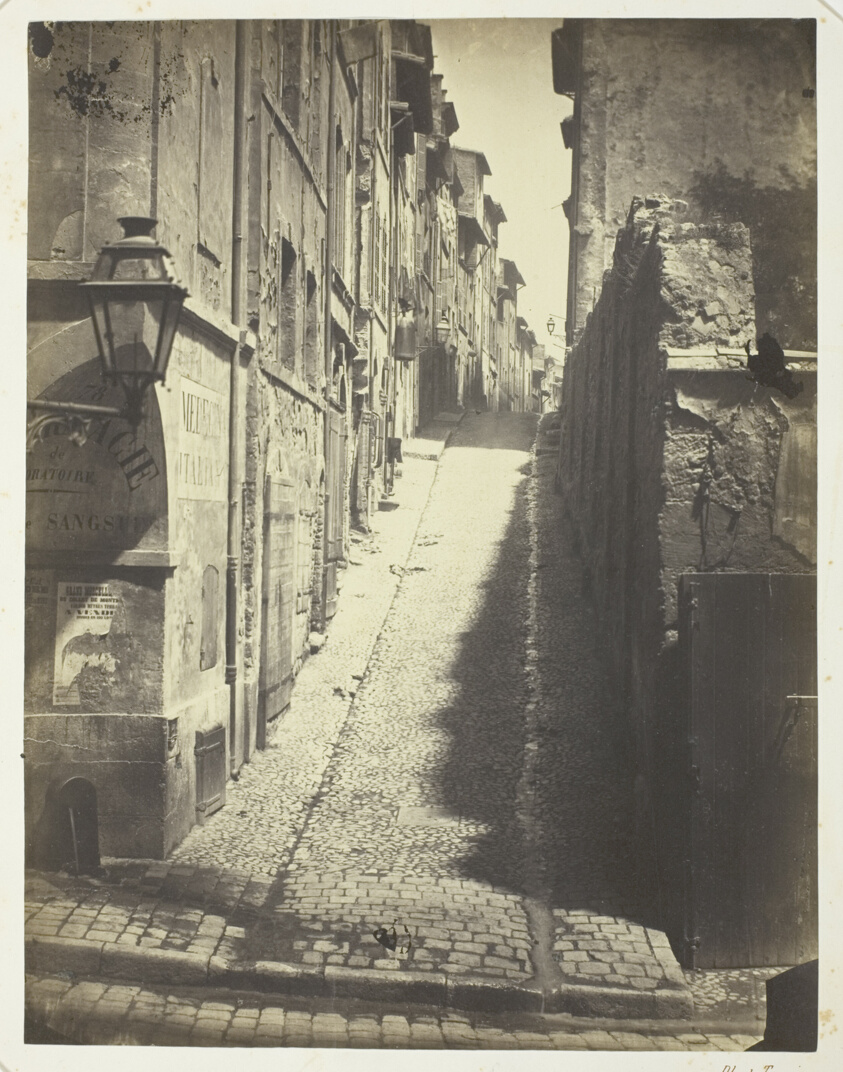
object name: Photograph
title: Rue des Grands Carmes, Vue prise de la Rue Ste. Marthe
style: 19th century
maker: Albert Terris; French, active Marseille, 1860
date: 1862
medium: Albumen print, from the album "Rénovation de la Vieille Ville de Marseille: Ouverture de la Rue Impériale"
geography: France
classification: albumen silver print; photographic process; photography; photograph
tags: cityscapes, photography, landscapes